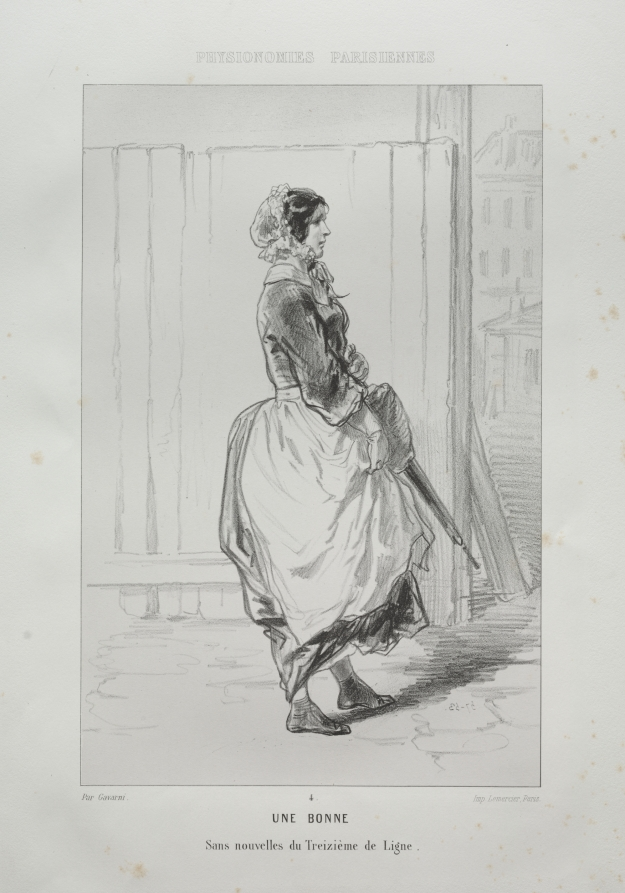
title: Une Bonne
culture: France, 19th century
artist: Paul Gavarni (French, 1804–1866)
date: c. 1857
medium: lithograph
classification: Print